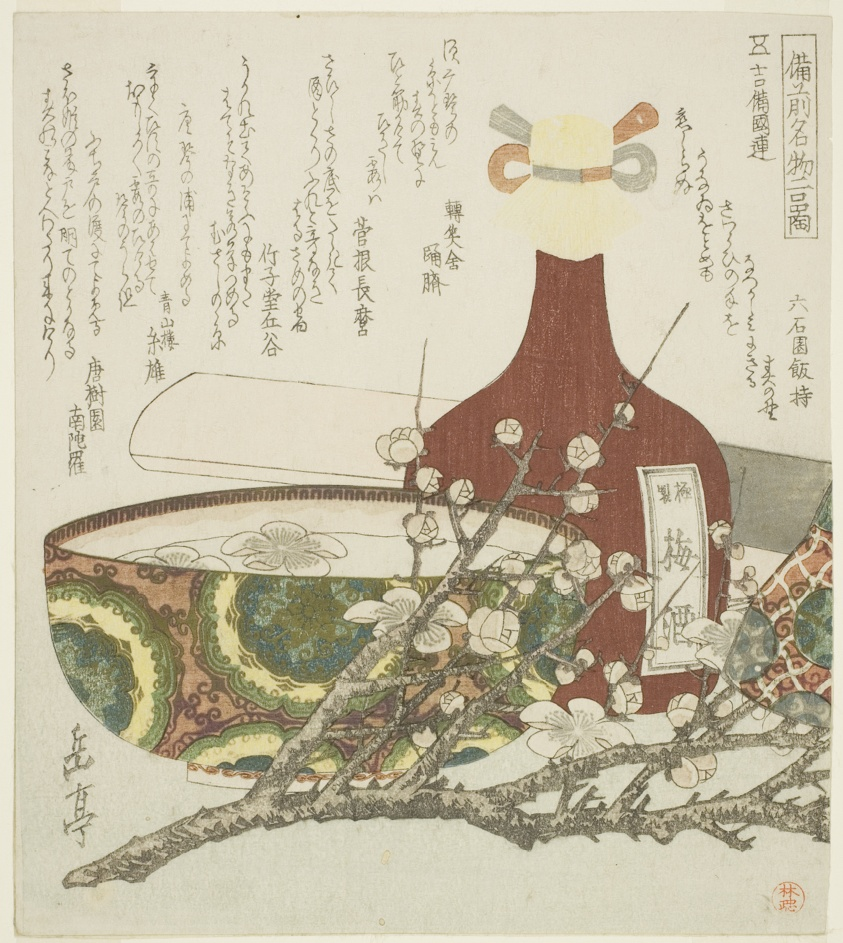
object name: Print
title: Wine bottle, bowl, and plum branch, from the series "Two Famous Products from Bizen Province (Bizen meibutsu futashina)"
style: Japanese (culture or style)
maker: Yashima Gakutei (Japanese, 1786 (?)-1868)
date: c. 1823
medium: Color woodblock print; shikishiban, surimono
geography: Japan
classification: woodblock print; print; asian art